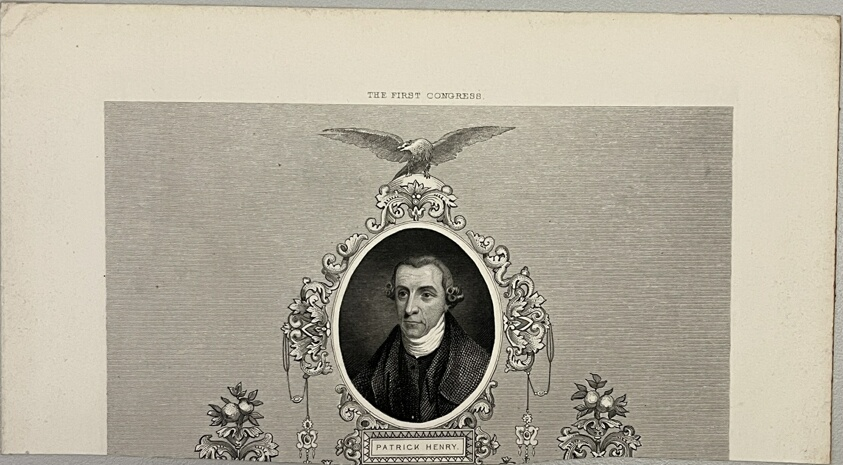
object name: Print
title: Untitled (Fragment of Print)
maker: Artist Unknown (Likely American, 19th century)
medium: Etching on paper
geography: United States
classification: reproduction; print; prints and drawing